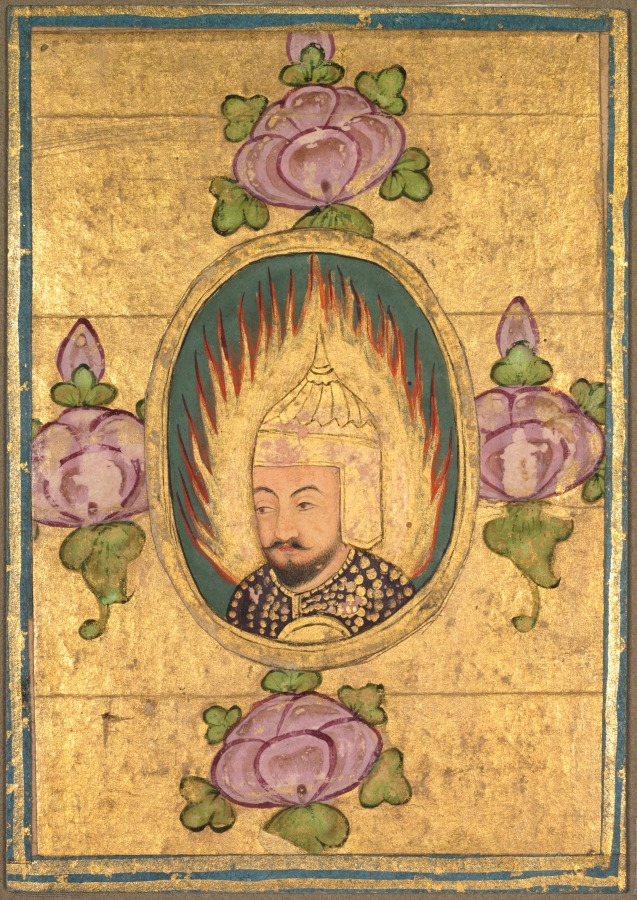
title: Babar(?)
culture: India, Mughal, 18th century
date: 1700s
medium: color on paper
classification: Painting